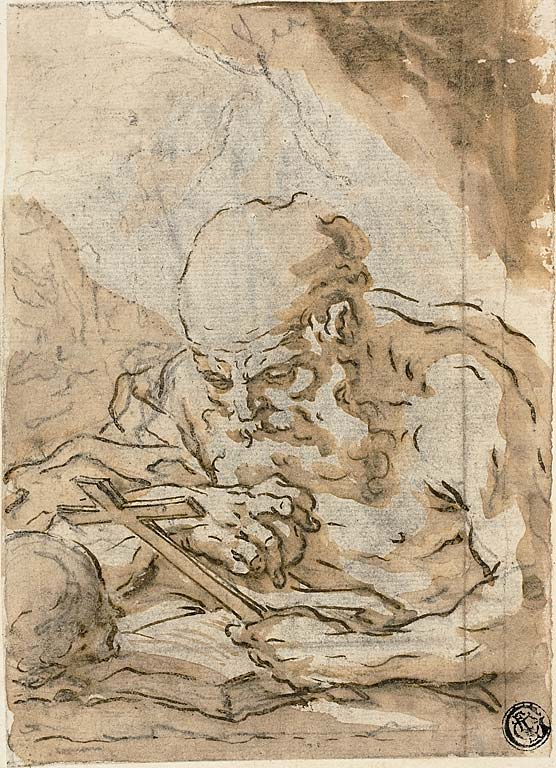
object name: Drawing and Watercolor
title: Saint Jerome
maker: Giuseppe Maria Crespi; Italian, 1665-1747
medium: Pen and brown ink, with brush and brown wash, with graphite, on ivory laid paper, laid down on ivory laid paper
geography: Italy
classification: pen and ink drawings; paper; drawings (visual works); prints and drawing